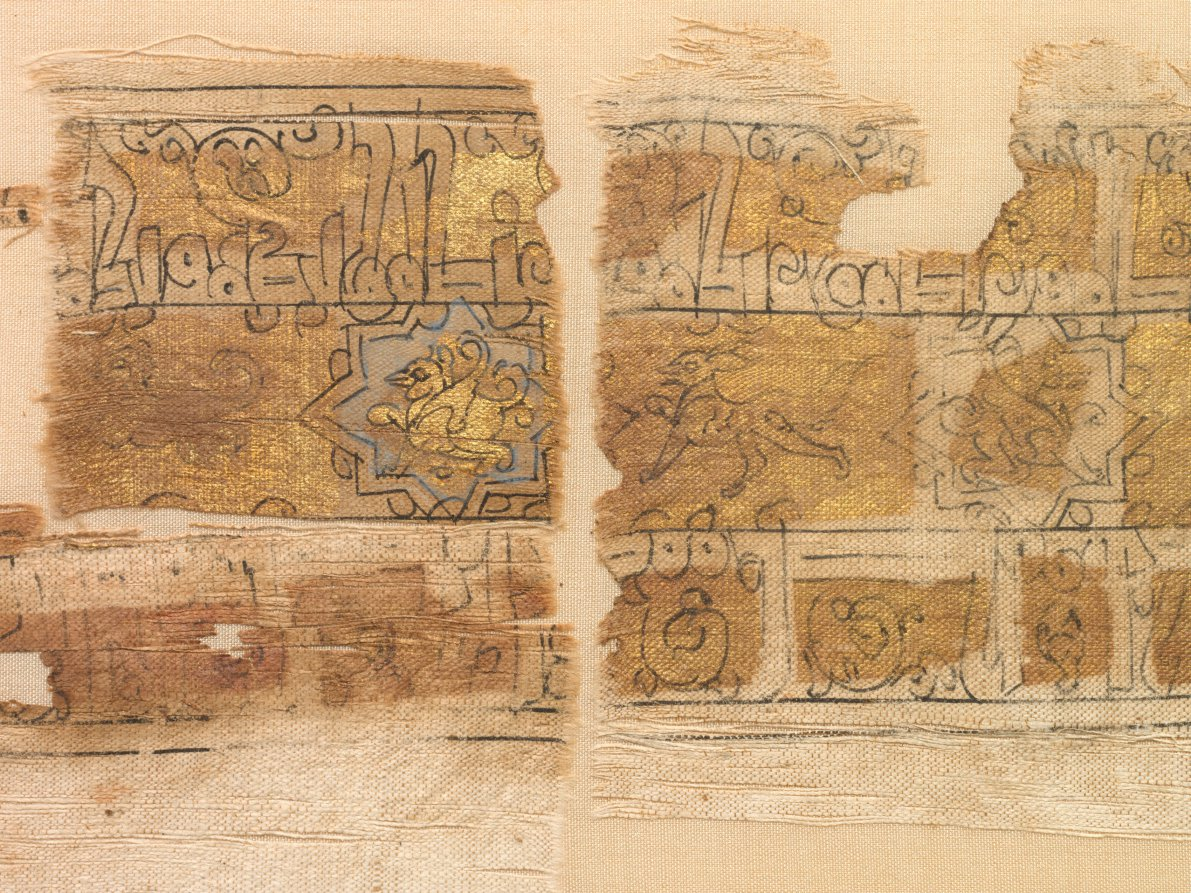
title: Fragment with tripartite band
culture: Iran or Iraq, Seljuq period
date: 1000s–1100s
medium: Silk warp and cotton weft (mulham): plain weave; gold leaf and ink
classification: Textile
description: This three-part band consists of two opposing bands of inscriptions flanking an ornamental band of winged griffins within eight-pointed stars, separated by various creatures—a rabbit, a cheetah, and possibly a sphinx. The inscriptions in the band are in simple Kufic against a floriated background. They, as well as the single band of inscription above, repeat in various combinations as benedictions, "endurance and good fortune, blessing, peace." The patches forming the background are gold, the design is drawn in black, and the background of only one star is blue. This textile probably reflects the international fashion or may have been made for export to Egypt, where this fragment likely survived.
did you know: Gold leaf was applied on mulham and decorated mostly likely with a stylus (pen) and ink drawing.